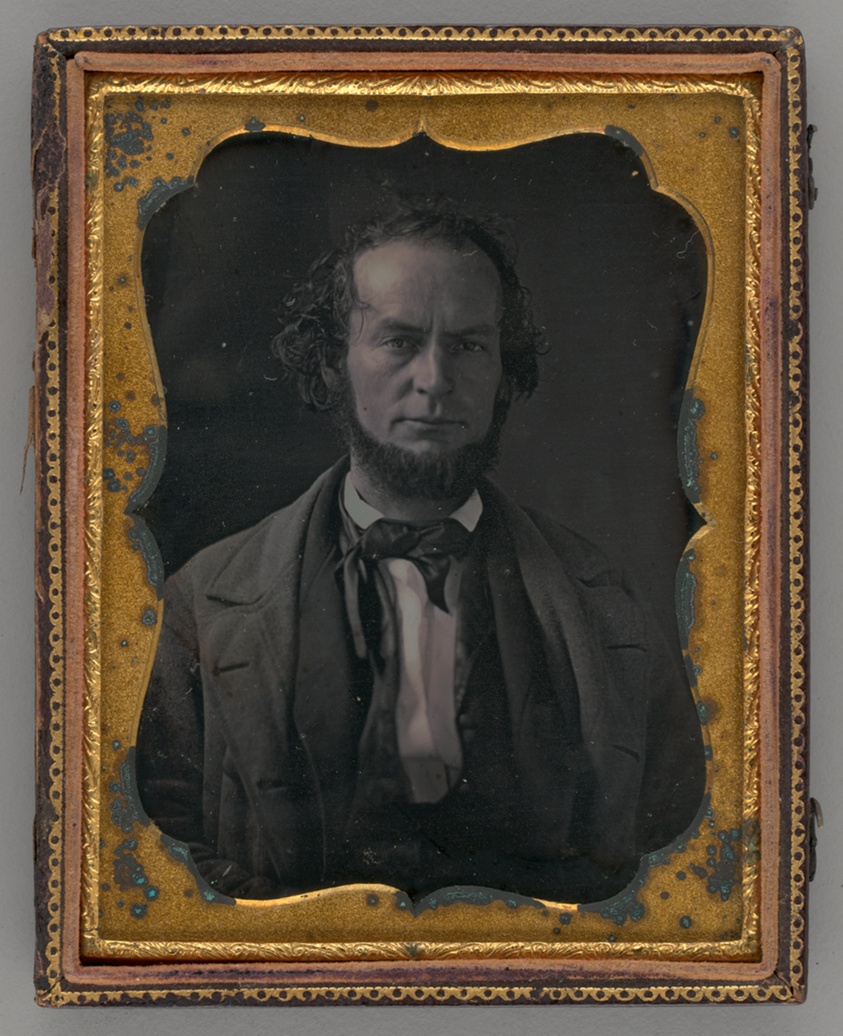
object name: Photograph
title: Untitled (Portrait of a Man)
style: 19th century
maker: Unknown maker; American, 19th century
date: 1855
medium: Daguerreotype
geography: United States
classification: portrait; photograph; photographic process; photography; portrait; daguerreotype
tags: lundberg collection, portraits, portraits: male subject, Male, portrait